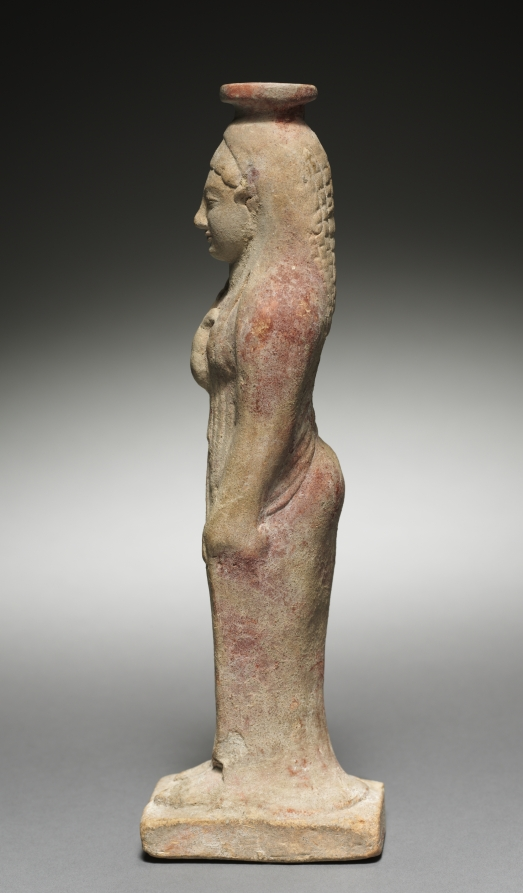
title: Kore-Shaped Perfume Flask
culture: Greece, Rhodes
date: 525–500 BCE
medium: terracotta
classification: Sculpture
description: Mold-made in the form of a standing maiden, or kore, this vessel likely once held expensive perfumed oil. The figure, who might represent the goddess Aphrodite, holds a dove by her chest with one hand, and her pleated drapery in the other. Traces of red pigment hint at a much more vibrant original appearance.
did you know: In ancient Greece, doves were symbols of beauty and love, associated with the goddess Aphrodite.